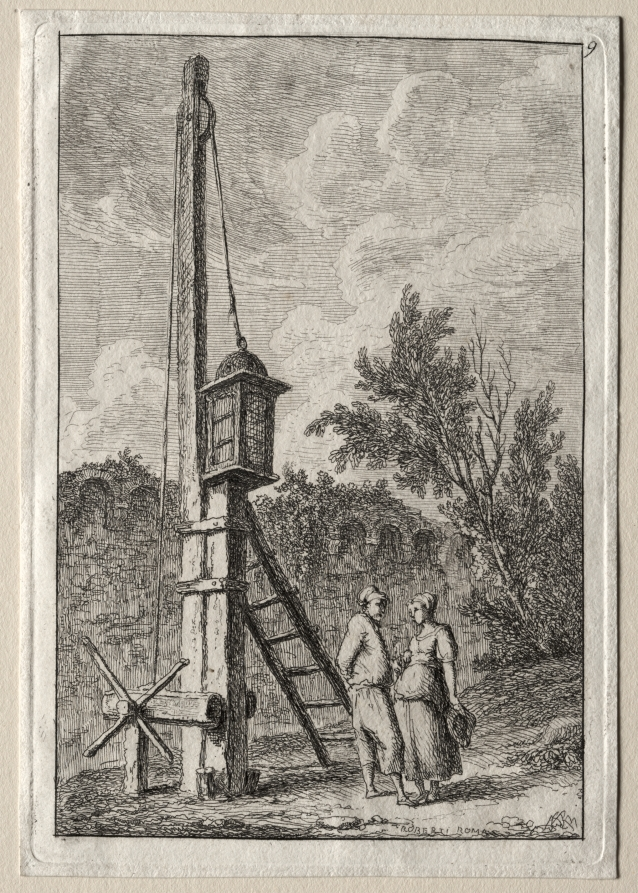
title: Le Poteau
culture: France, 18th century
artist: Hubert Robert (French, 1733–1808)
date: 1763–64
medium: etching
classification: Print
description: Derived from his own pen-and-ink drawings, this suite of etchings features fictional characters situated near recognizable buildings and statues in Rome. On the title page, Robert dedicated the suite to Marguerite Le Compte, who visited Rome in 1764 in the company of the wealthy author and art enthusiast Claude Henri Watelet. Both Le Compte and Watelet were amateur etchers, and they socialized with a group that included artists and printmakers centered at the academies in Italy. Robert’s dedication was likely motivated by the hope of future patronage from Le Compte. She may be the generous woman with a hand muff depicted in The Ancient Temple, the fifth scene in this series.